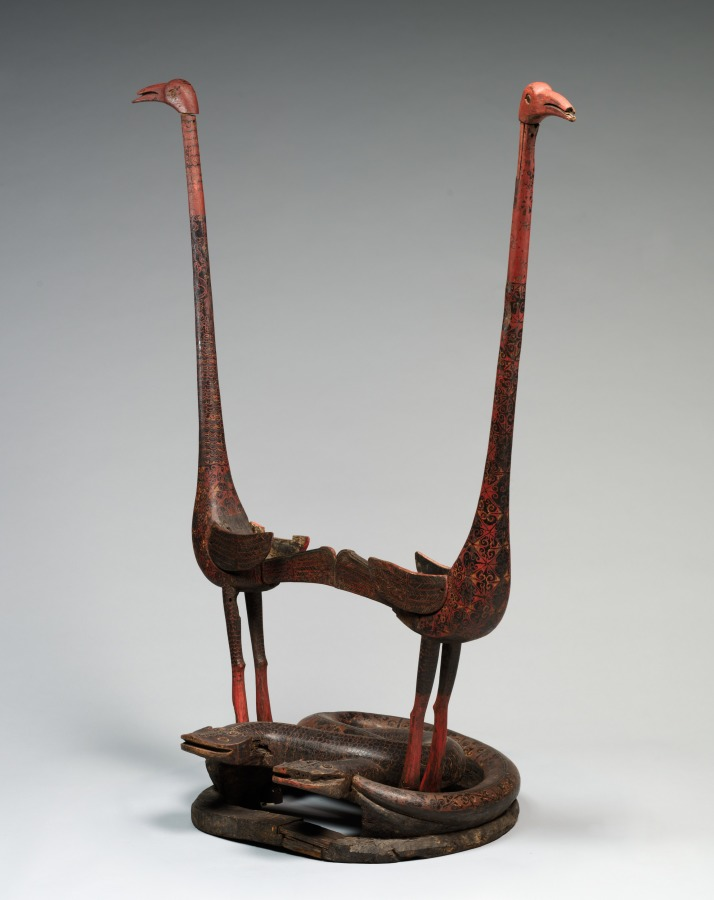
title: Cranes and Serpents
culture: China, reportedly from Hunan province, Changsha, Warring States period (475–221 BCE), State of Chu (c. 1046–223 BCE)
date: 475–221 BCE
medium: lacquered wood with polychromy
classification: Sculpture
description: A different style of ritual art developed in the state of Chu in South China. In addition to bronze vessels, lacquered wood artifacts expanded the repertory of ritual implements. This extraordinary sculpture was probably a drum stand for supporting a suspended drum in ritual ceremonies. It is unique among other excavated drum stands of the Chu, which typically show two birds standing on tigers. The theme of the bird stepping on the serpent was common in the Chu visual culture. Yet the slender proportions and seemingly flimsy structure of this particular set raise the question of whether it was utilitarian or mostly served symbolic functions in the tomb. The birds' and serpents' bodies have designs painted in red lacquer and yellow pigment against the black lacquer. Scientific analyses confirm the additional use of a blue or green pigment that has been discolored over time.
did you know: The cranes' long necks allowed a lightweight drum to be suspended from strings through the beaks, while the densely intertwined snakes provided a weighty base to stabilize the object during musical performances.